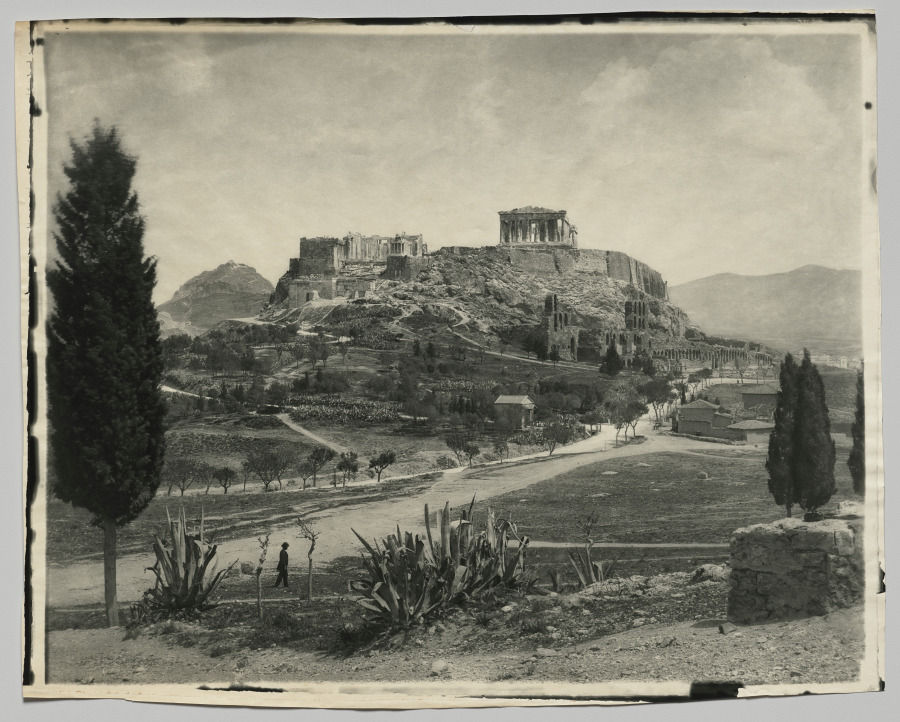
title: View of the Acropolis (walking man in foreground)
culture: France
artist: Adolphe Braun & Co. (French, 1845–1894)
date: c. 1880s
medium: mammoth carbon print, brown-toned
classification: Photograph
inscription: Written in pencil on verso: "79"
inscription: Written in pencil on verso: "Acropole"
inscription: Written in pencil on verso: "D"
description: Adolphe marketed his photos of flowers, artworks, landscapes, and monuments from across Europe throughout that continent and in North America. The Acropolis of Athens, the most famous ancient Greek site, must have sold well; Braun offered multiple views of it. The image on a carbon print is formed from pigmented gelatin, which is far more resistant to fading than the silver or metal salts in silver-based prints.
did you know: Carbon prints are among the stable and long-lasting photographic processes.